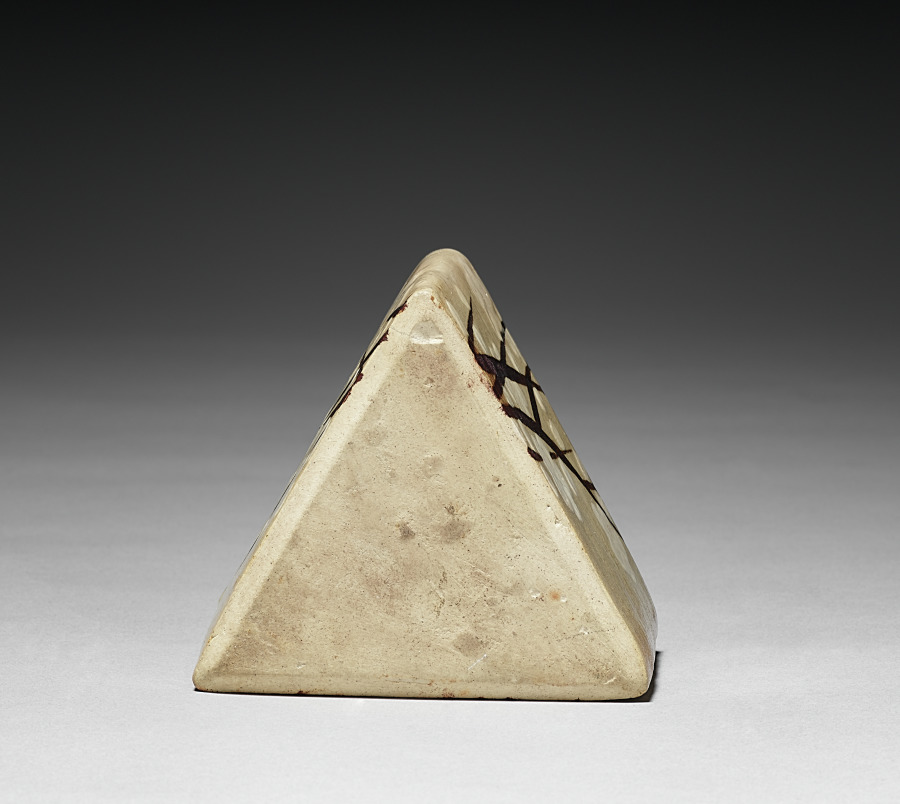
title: One of Five Serving Bowls (Mukozuke) with Prunus Design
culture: Japan, Edo period (1615–1868)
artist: school of Ogata Kenzan (Japanese, 1663–1743)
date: 1700s to mid-1800s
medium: Kyoto Ware: stoneware with underglaze iron oxide and slip decoration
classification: Ceramic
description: Note the rough, tan, clay bodies of these bowls with their deliberate irregularities. The design of branches was first painted in a black iron oxide, then the blossoms and buds in a white slip, followed by the application of a very thin transparent overglaze.